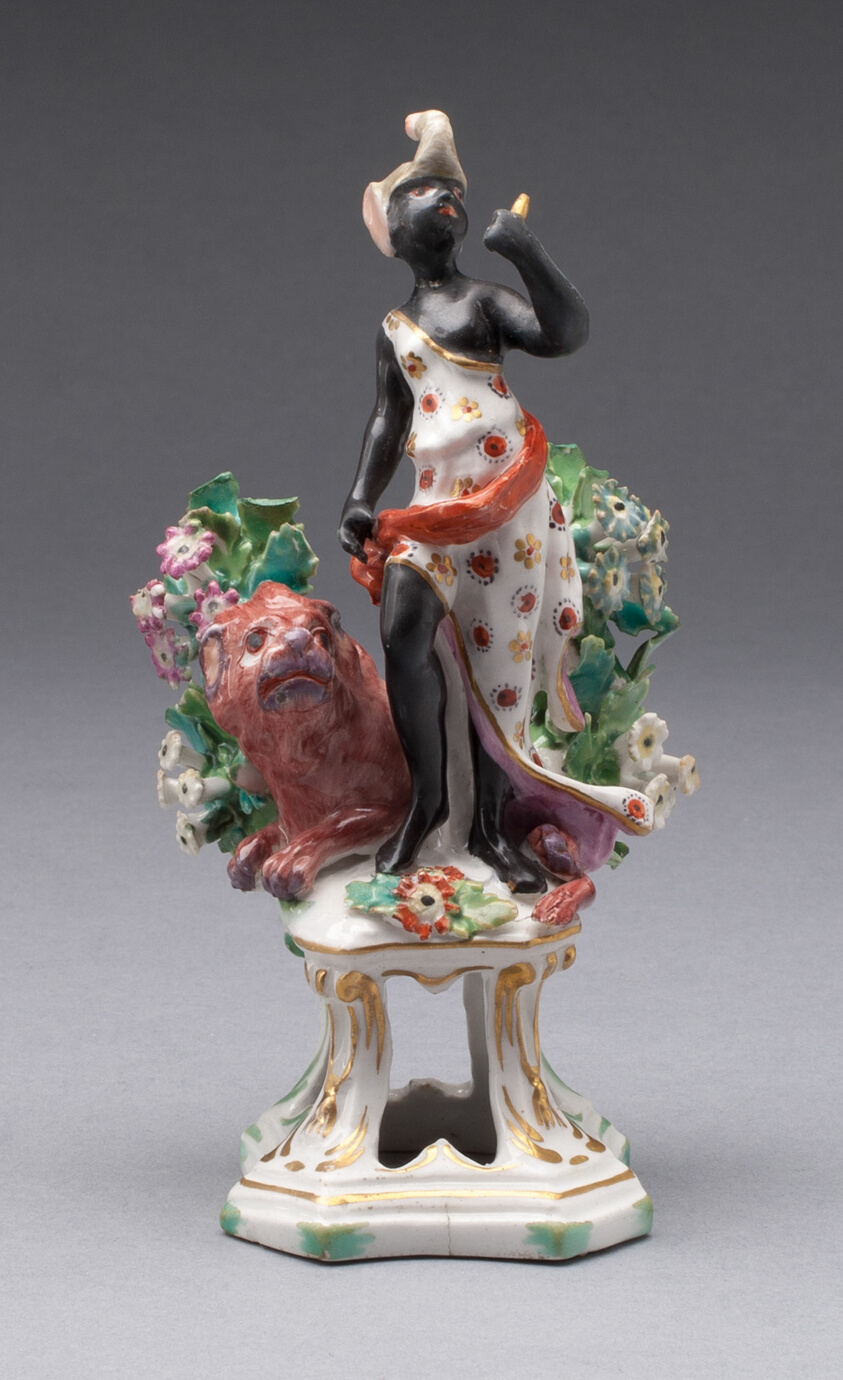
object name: Ceramics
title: Figure of Africa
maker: Bow Porcelain Factory (London, England, 1744-1775)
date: c. 1766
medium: Soft-paste porcelain, polychrome enamels and gilding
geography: Bow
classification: porcelain; ceramics; european decorative arts